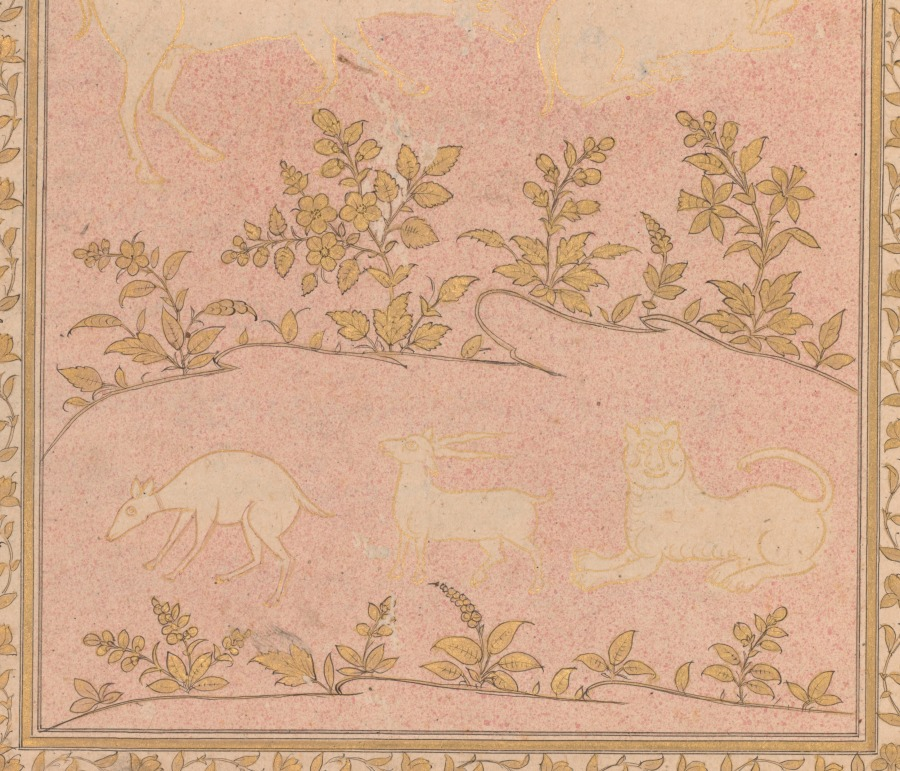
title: Stenciled Scenes of Lion and Gazelle (verso)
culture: Mughal India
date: c. 1710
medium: Ink and gold on paper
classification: Painting